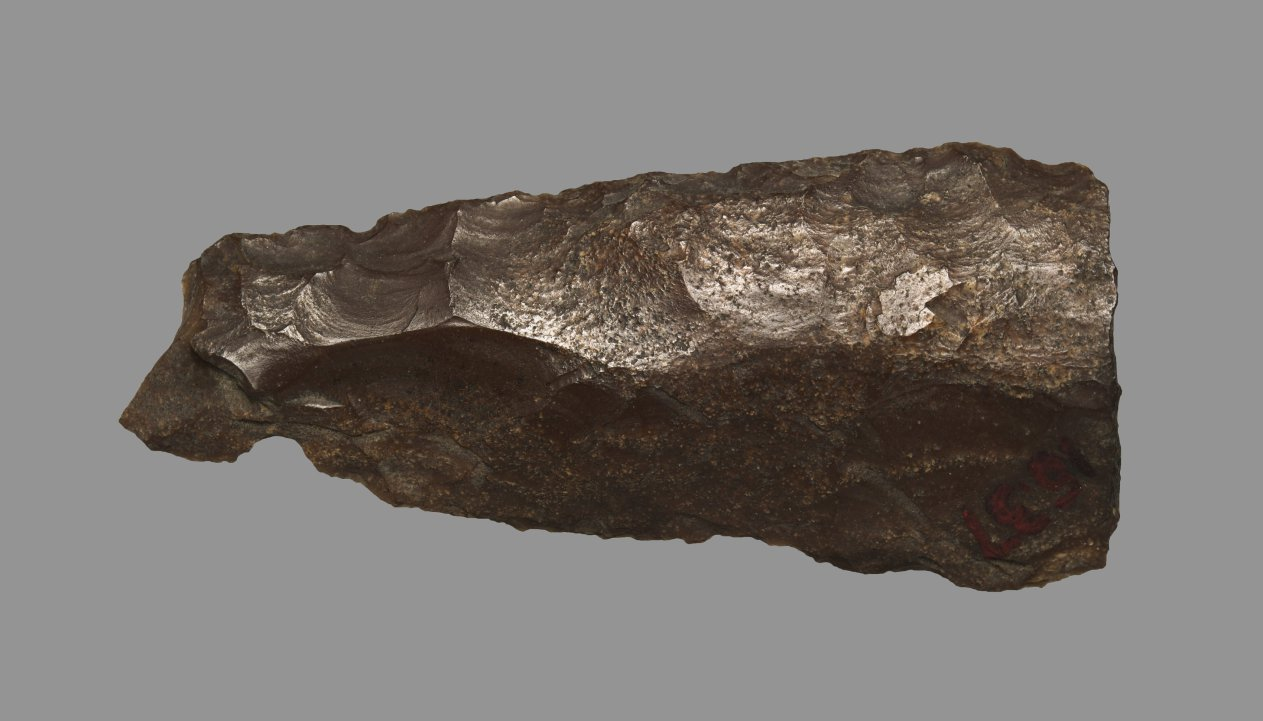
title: Hand Axe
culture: Egypt, Haraga, excavated in 1914, Predynastic (5000–2950 BCE)–Old Kingdom (2647–2124 BCE)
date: 4400–2100 BCE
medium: dark-brown-colored flint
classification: Implements